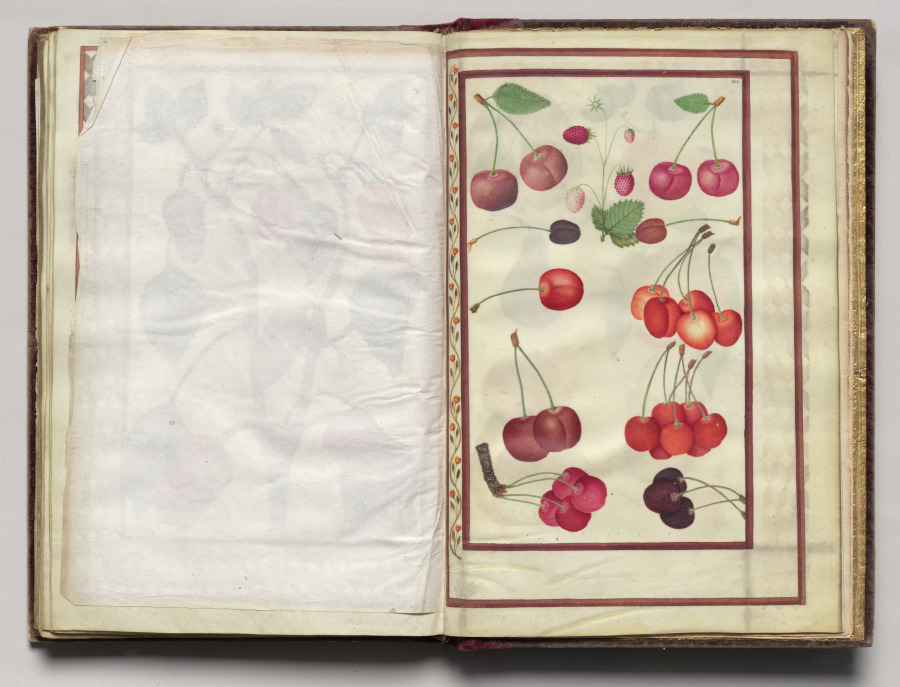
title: Cherries and Strawberries, folio 47 (recto), from Florilegium (A Book of Flower Studies)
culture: France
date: 1608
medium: watercolor, ink, silver, and gold over occasional traces of pencil, on vellum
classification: Bound Volume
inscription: Dated: Poitiers 1608 (on frontispiece) Signed: On frontispiece in black ink, lower right: Van Kuyk Notation on drawing: Frontispiece: in pencil, lower margin: * élève de Van Kessel, peintre flammand (* in pencil also appears in front of Van Kuyk's name).